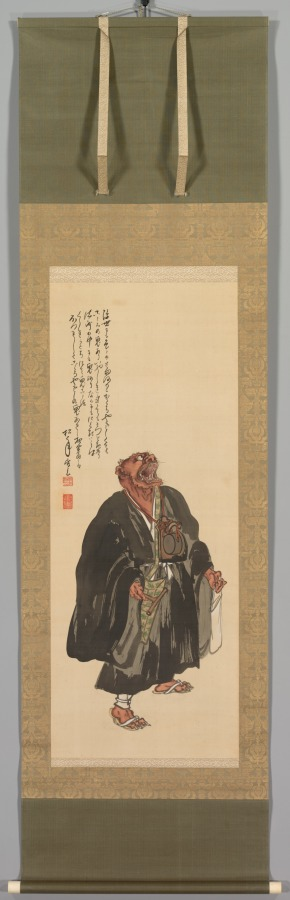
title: Demon Intoning the Name of the Buddha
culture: Japan, Meiji period (1868–1912)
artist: Suzuki Shōnen (Japanese, 1849–1918)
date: late 1800s–early 1900s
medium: hanging scroll; ink and color on silk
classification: Painting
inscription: artist's inscription, signature, and seal upper left.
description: Among the subjects of souvenir paintings made since the 1600s in Ōtsu, a travel hub near Kyoto in western Japan, was a demon in monk’s robes reciting the name of the Buddha Amida to the rhythm of his gong. Ōtsu paintings largely disappeared with the advent of rail travel in the late 1800s, as people no longer stopped in the area. In this work, Kyoto-based artist Suzuki Shōnen reimagined the demon for the modern era—the simple figure from the Ōtsu painting is transformed into a realistic one accompanied by a calligraphic meditation on its nature.